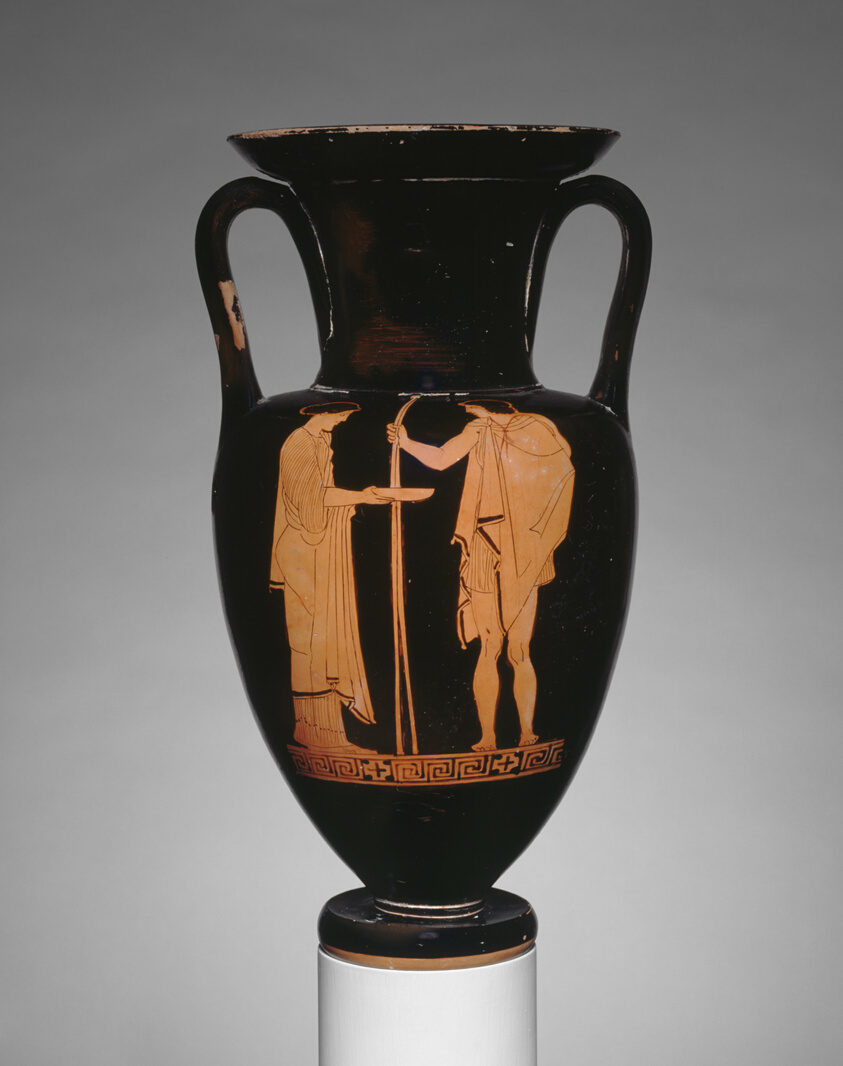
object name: Vessel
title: Amphora (Storage Jar)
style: red-figure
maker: Attributed to the Sabouroff Painter; Greek; Athens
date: 455-445 BCE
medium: terracotta, red-figure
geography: Nola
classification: vessel; earthenware; ceramics; ancient art